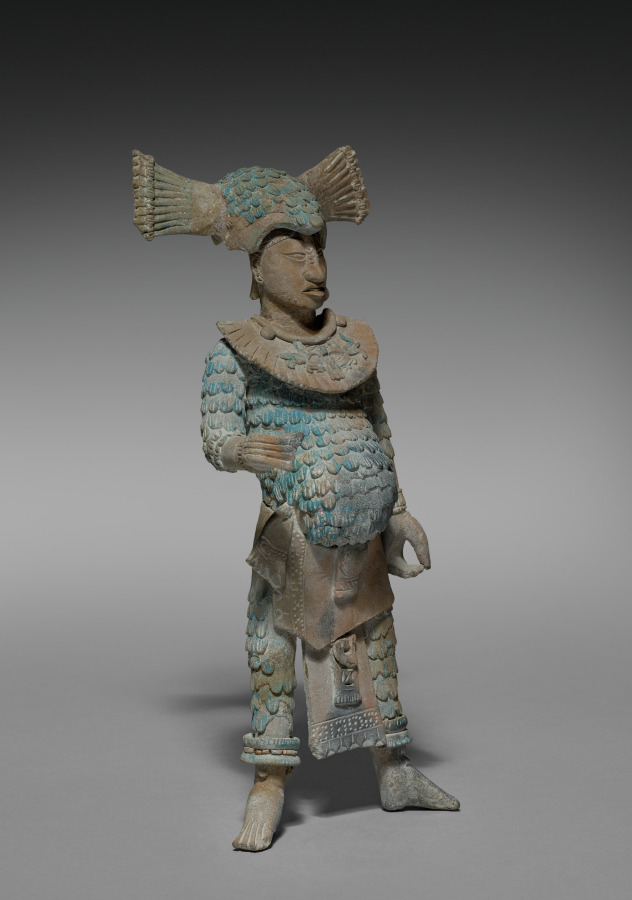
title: Warrior Figurine with Removable Headdress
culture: Mexico, Yucatán, Jaina Island region, Campeche, Maya style (250-900)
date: 600–900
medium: earthenware with pigment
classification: Sculpture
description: The major offerings placed in the Maya graves of Jaina Island were ceramic figurines, some of Mesoamerica's finest, that depict deities and humans in a variety of roles. This warrior, his headdress removable, once probably held weapons and wears either quilted cotton armor or the feathered uniform of a military order. We don't know why such figures are often pot-bellied.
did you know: Maya blue pigment was made by combining clay with indigo in a complex technique developed around the ninth century.